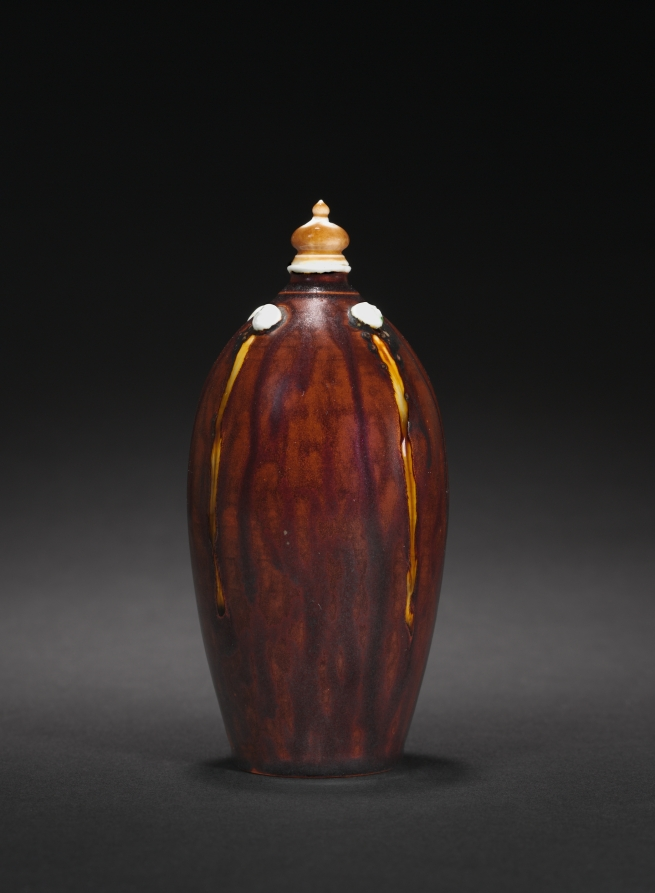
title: Covered Vase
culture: France, 20th century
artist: Sèvres Porcelain Factory (French, est. 1756)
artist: Taxile Maximin Doat (French, 1851–1939)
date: 1901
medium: porcelain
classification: Ceramic